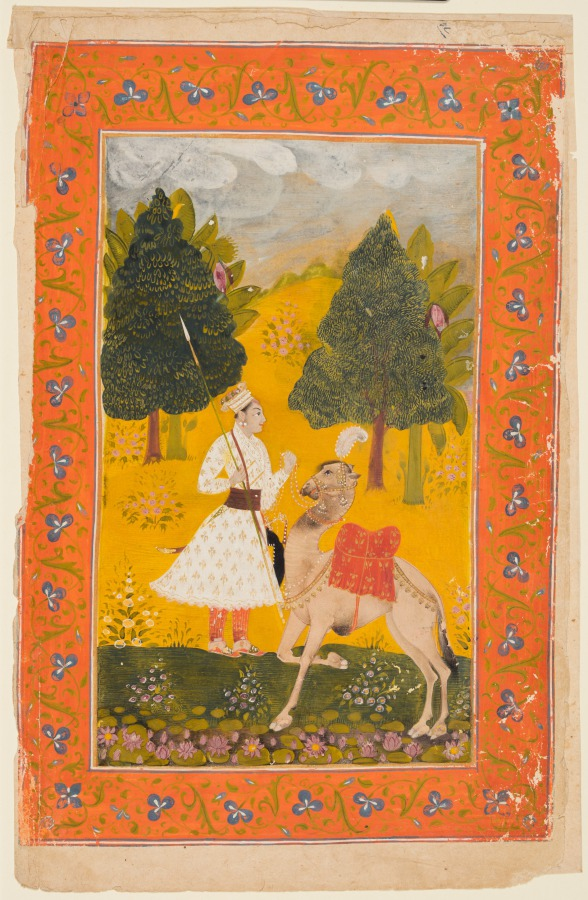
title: Maru Ragini, from a Ragamala (Garland of Melodies)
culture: Northwestern India, Rajasthan, Rajput Kingdom of Amber or Southwestern India, Deccan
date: 1650–80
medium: Gum tempera, ink, and gold on paper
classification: Painting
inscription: mārū rāginī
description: A Rajput warrior holding a spear, with piercing dagger (katar) and sword attached to his belt, stands alone with his camel in a landscape. They have arrived at the banks of a stream, verdant in contrast to the intense hot yellow of the ground behind them. The musical mode associated with this painting is based on folk melodies of Rajasthan, where local stories feature a hero with a camel mount.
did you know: The warrior’s belt is called a kamarband in Persian and is the origin of the English cummerbund.